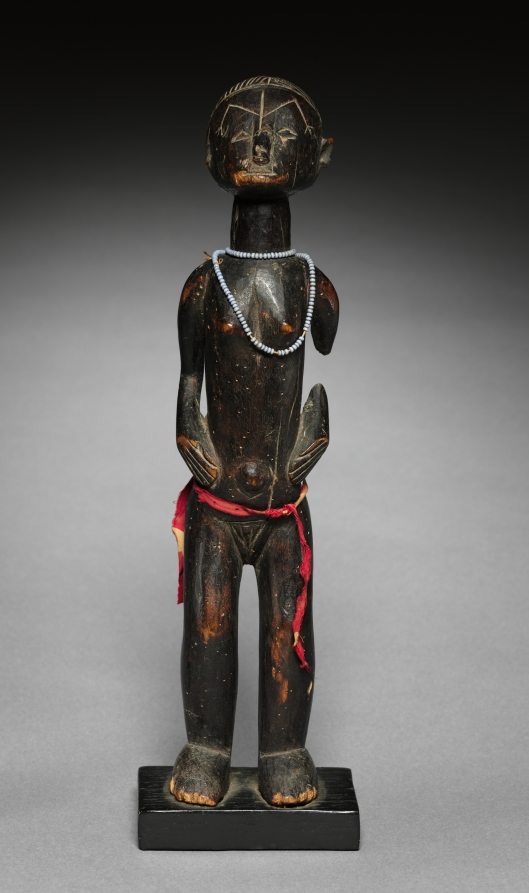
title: Female Figure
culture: Democratic Republic of the Congo, Tabwa, late 19th or early 20th century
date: 1900s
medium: Wood, cloth, glass beads, and natural fiber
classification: Sculpture